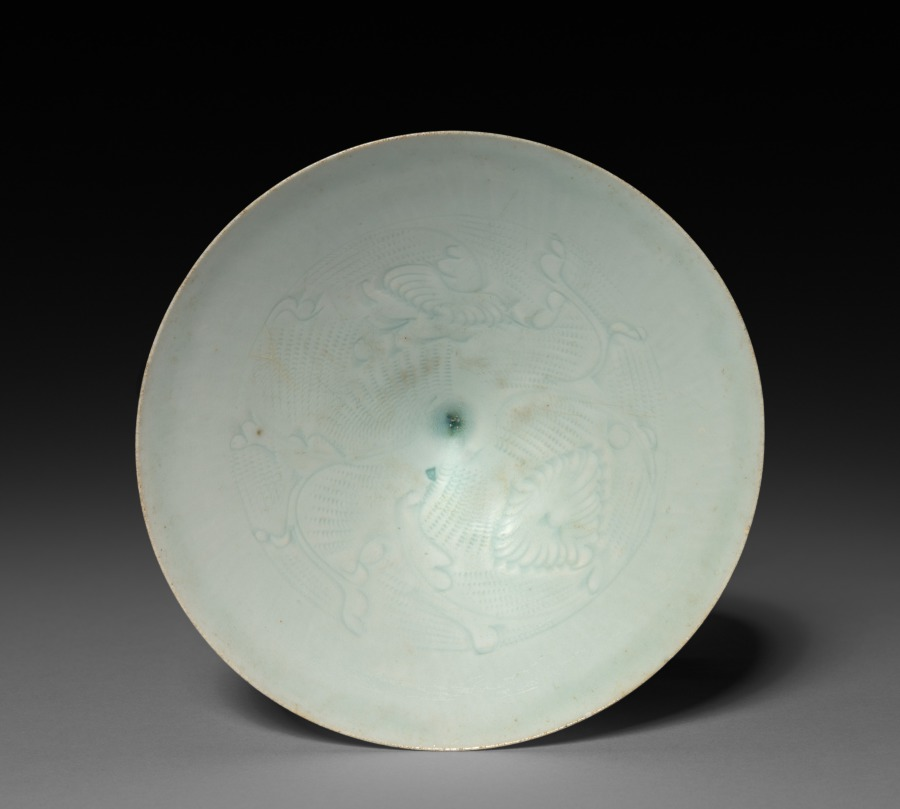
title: Conical Bowl with Floral Scroll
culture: China, Jiangxi Province, Jingdezhen kilns, Southern Song dynasty (1127–1279)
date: 1100s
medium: Glazed porcelain with incised decoration, qingbai ("blue-white") ware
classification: Ceramic